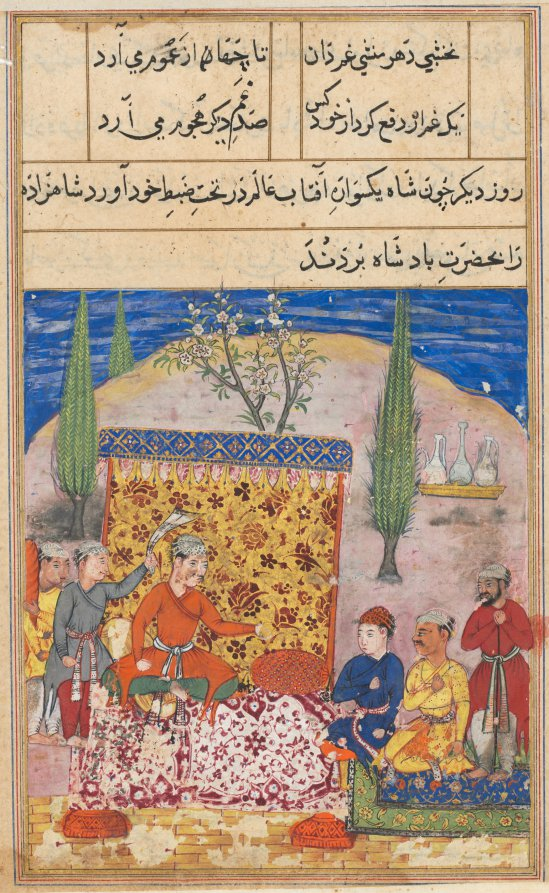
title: The young prince is presented to the king, his father, by his teacher, but refuses to speak, from a Tuti-nama (Tales of a Parrot): Eighth Night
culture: Mughal India, court of Akbar (reigned 1556–1605)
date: c. 1560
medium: gum tempera, ink, and gold on paper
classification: Painting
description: As the prince grew up, he was failing in his studies. After 12 years of frustration, the king found a teacher who used pictures and creative oral techniques to help him learn. When the day came for his examinations that would prove him fit to rule, both the prince and the teacher were confident that he was well prepared. Before going in for the examinations, the teacher read his horoscope and discovered that disaster would befall him that very week, unless he kept completely silent until the seven-day period of danger had passed. The painting on this page shows the prince in blue next to his teacher in yellow, kneeling before the king.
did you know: The four points of cloth at the bottom of the men’s tunics are for tying up when mounted on horseback.